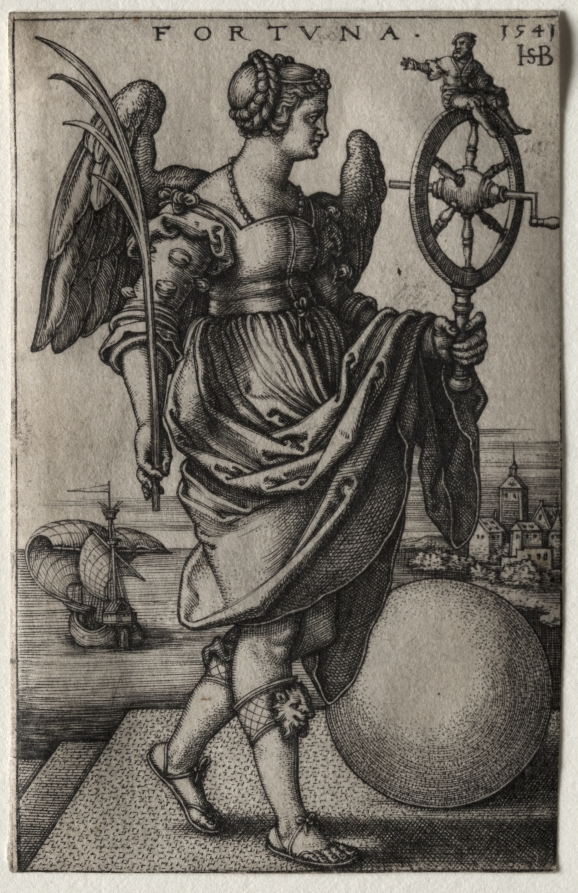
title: Fortune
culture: Germany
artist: Hans Sebald Beham (German, 1500–1550)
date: 1541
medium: engraving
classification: Print